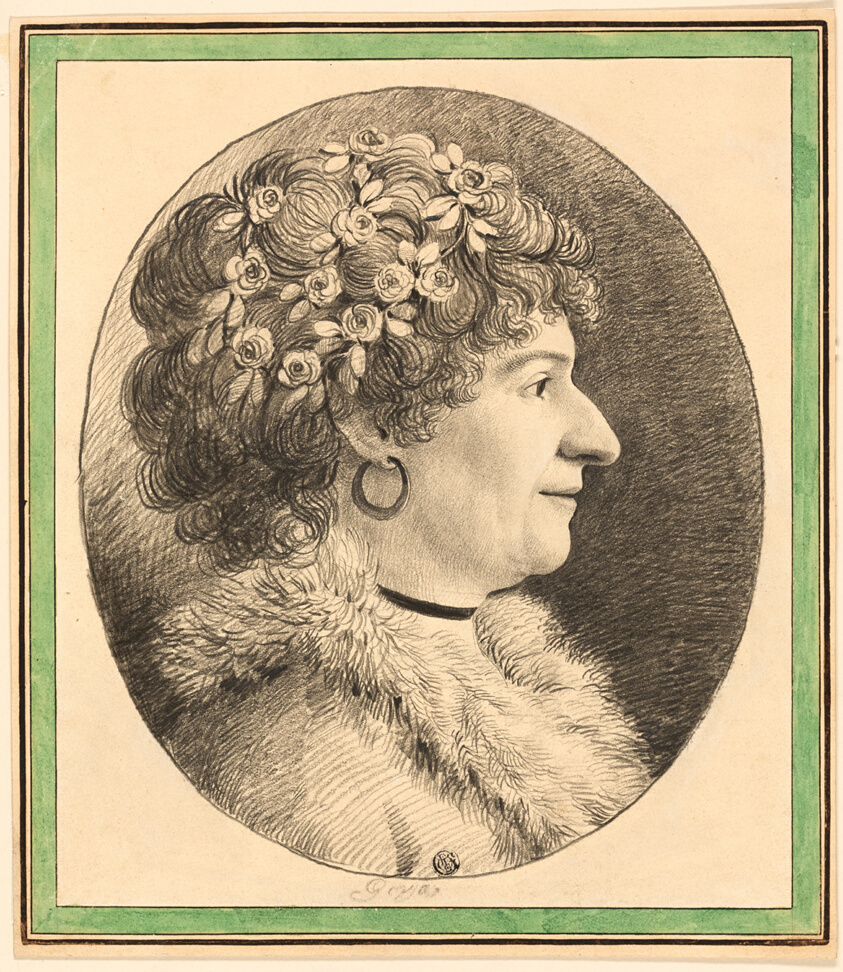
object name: Drawing and Watercolor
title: Profile Bust of a Woman with Flowers in Her Hair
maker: Unknown Artist; Spanish, 18th-19th centuries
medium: Black crayon on ivory wove paper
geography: Spain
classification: crayon; drawings (visual works); prints and drawing